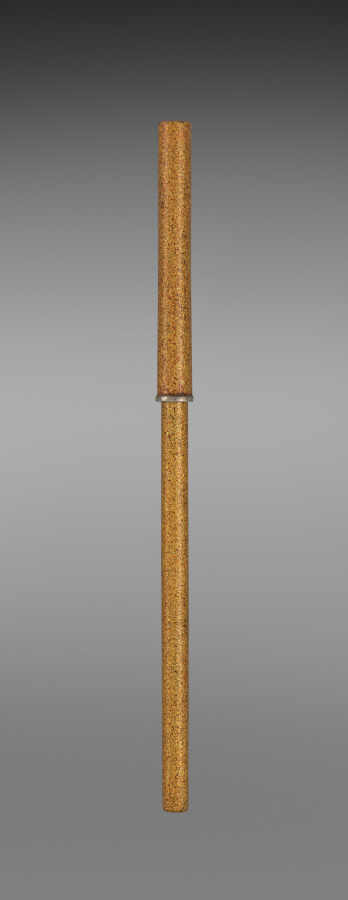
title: Writing Box (Suzuribako) with the “First Song” (Hatsune) Chapter from the Tale of Genji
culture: Japan, Meiji period (1868–1912)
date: early 1900s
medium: Lacquered wood with gold and silver sprinkled powder (maki-e), foil application (kirikane), and metal inlay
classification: Lacquer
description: The design of this box was inspired by an object in the 1639 lacquer wedding set of Chiyohime, the daughter of the shogun (ruler). Information about the set became available in the Meiji period, leading some lacquer artists to emulate its designs. This box features a scene from the chapter “First Song” (Hatsune) of the Tale of Genji, in which Prince Genji and his love Murasaki enjoy her garden. It incorporates the written characters for “first” (初, hatsu) and “sound” (音, ne), indicating the first song of the warbler in spring, associated with the new year—the water dropper for mixing the ink is in the shape of this bird.